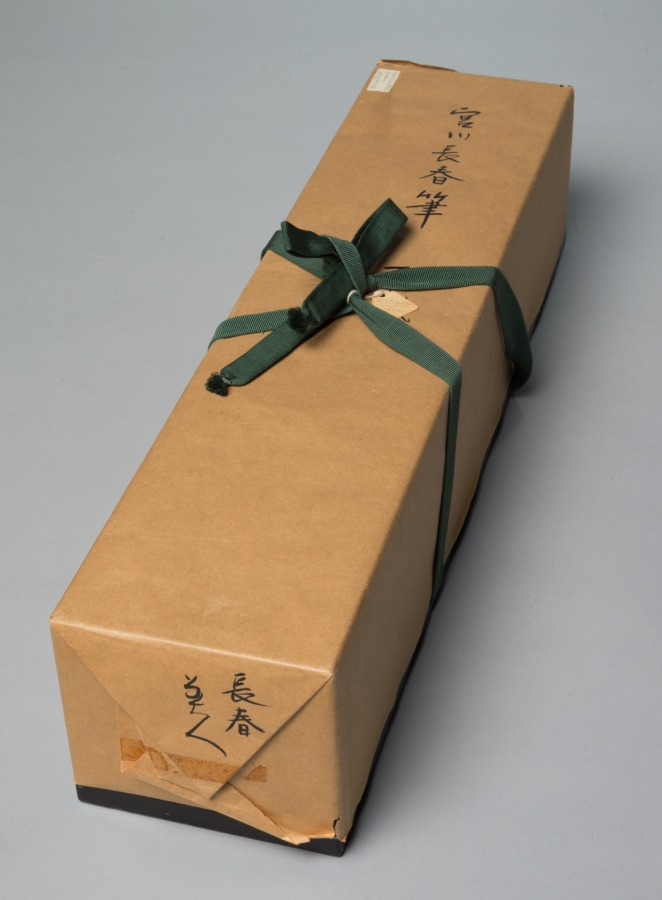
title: Spring Dancers (Manzai)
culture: Japan, Edo period (1615–1868)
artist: Miyagawa Chōshun (Japanese, 1683–1753)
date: early to mid-1700s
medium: hanging scroll; ink and color on paper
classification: Painting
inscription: Artist's signature and gourd-shaped seal lower right corner.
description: Manzai is the Japanese term for wandering comic dancers. The painting depicts one of the traditional pleasures of the spring season.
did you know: One performer is playing a hand-held drum, like CMA 1918.349.